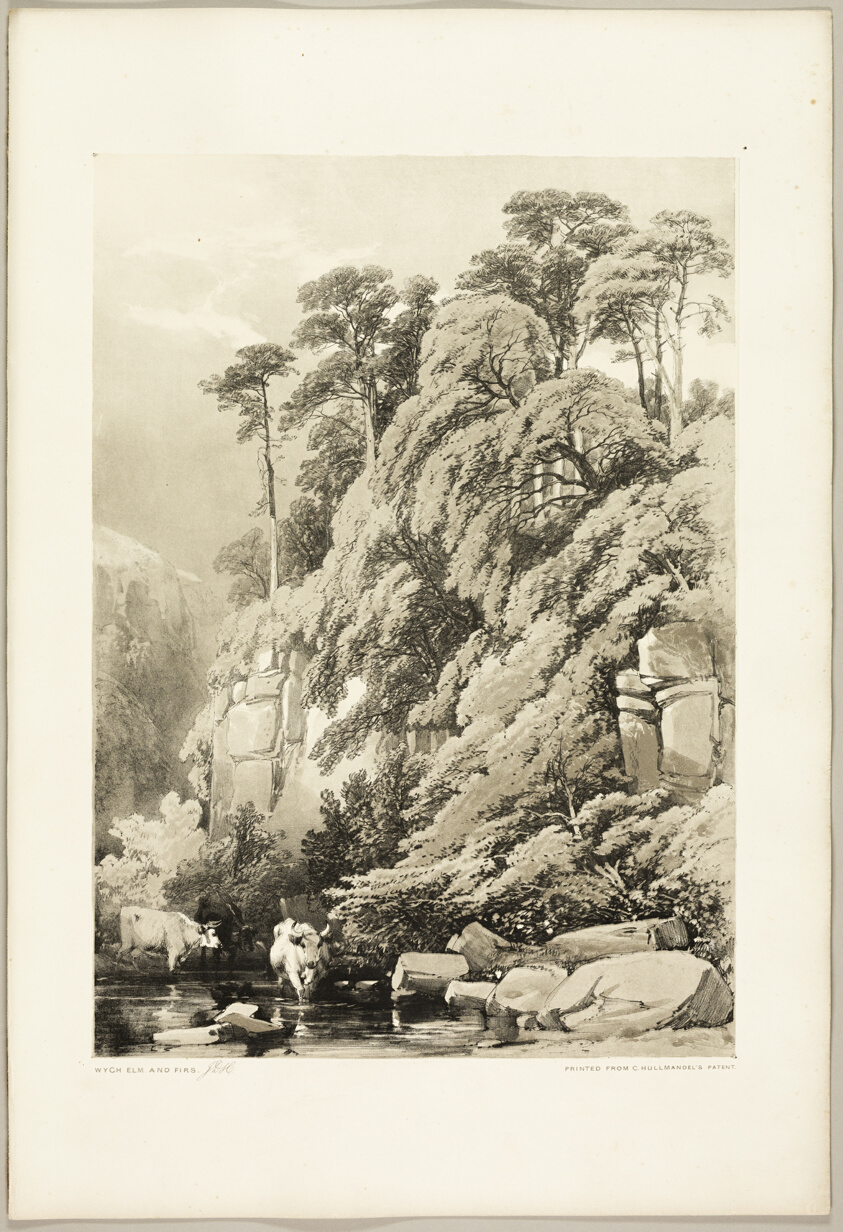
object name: Print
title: Wych Elm and Firs, from The Park and the Forest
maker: James Duffield Harding (English, 1798-1863); printed by Charles Joseph Hullmandel (English, 1789–1850); published by Thomas McLean (English, 1788–1875)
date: 1841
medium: Lithograph in black, with gray tint from a second plate, on ivory wove paper, laid down on ivory wove paper (chine collé)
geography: England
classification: lithograph; print; prints and drawing